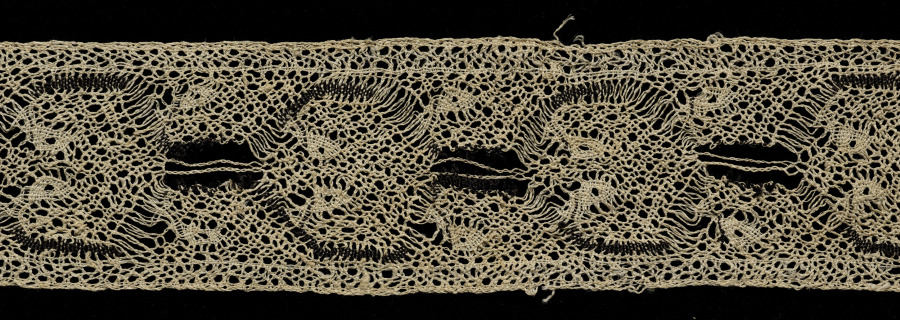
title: Lace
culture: Africa, North Africa, Morocco, Moroccan maker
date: 1800s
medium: Linen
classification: Lace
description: This fragment is an example of bobbin lace made of linen. It is a strip of insertion, which means it has two flat sides allowing it to be inserted into a garment as a panel.